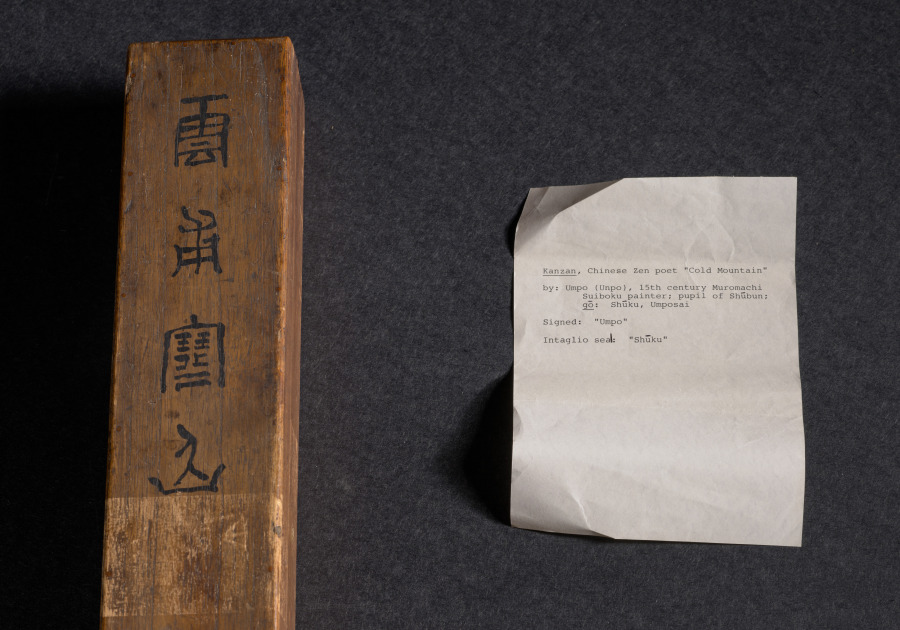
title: Kanzan Holding a Scroll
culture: Japan, Muromachi period (1392–1573)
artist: Unpo Shūkū (Japanese, active 1400s)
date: 1400s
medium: hanging scroll; ink on paper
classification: Painting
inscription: signed: "Unpo"